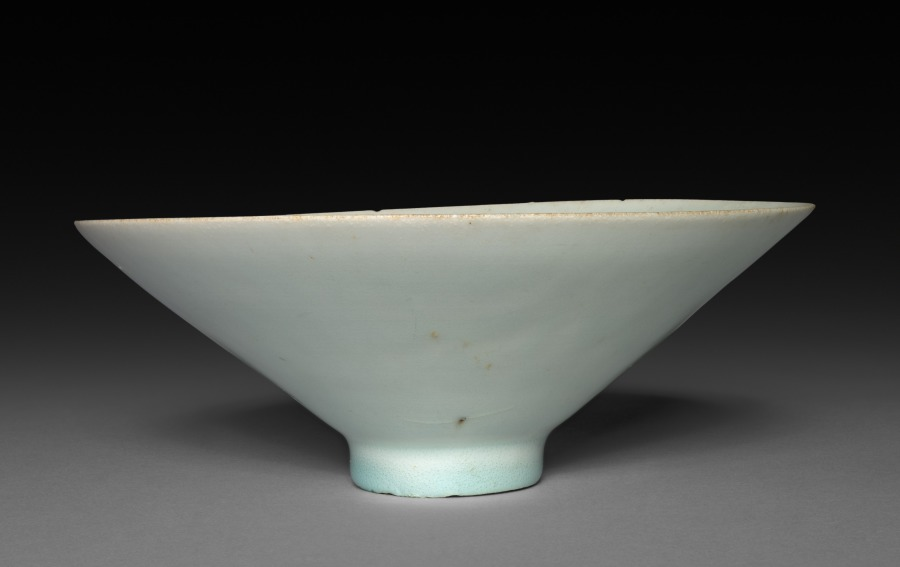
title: Conical Bowl with Floral Scroll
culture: China, Jiangxi Province, Jingdezhen kilns, Southern Song dynasty (1127–1279)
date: 1100s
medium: Glazed porcelain with incised decoration, qingbai ("blue-white") ware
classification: Ceramic